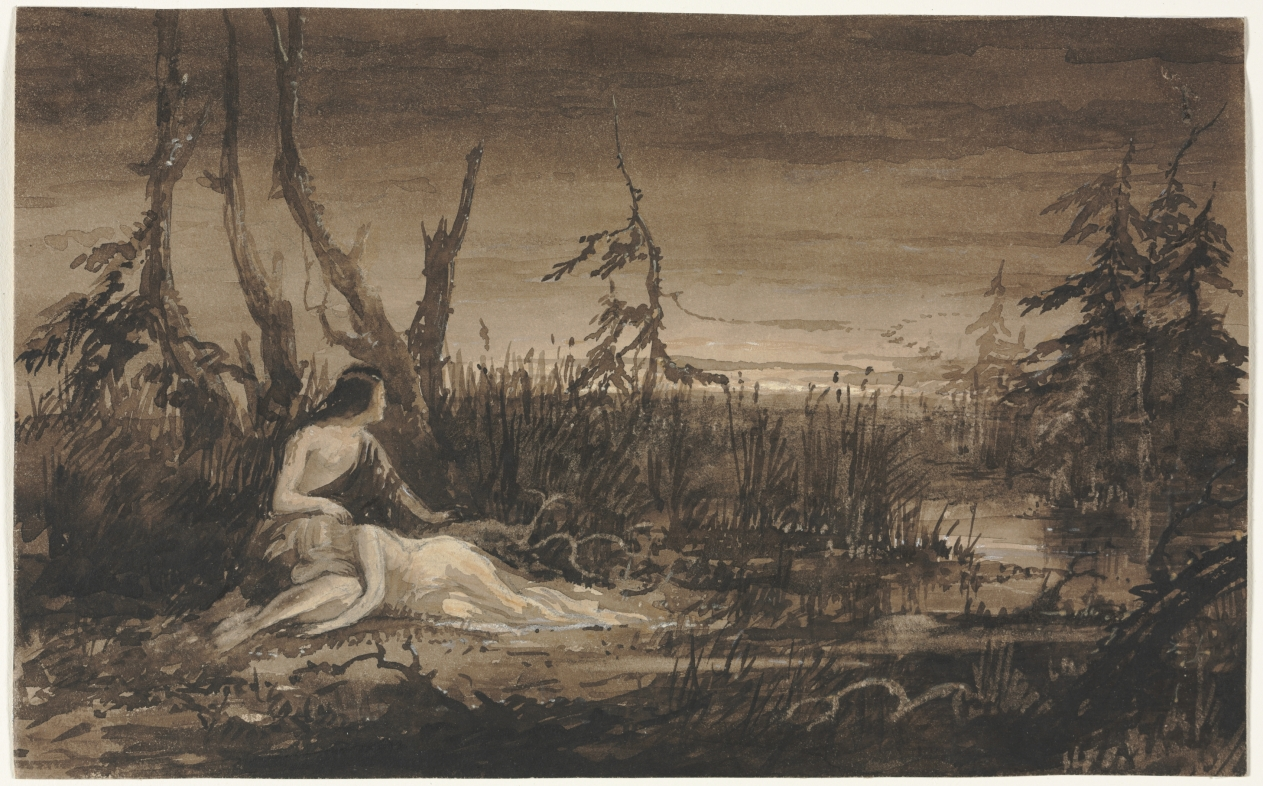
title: Figures in a Landscape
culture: England, 19th century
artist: Francis Danby (British, 1793–1861)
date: c. 1813–61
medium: brush and brown ink with white heightening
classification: Drawing